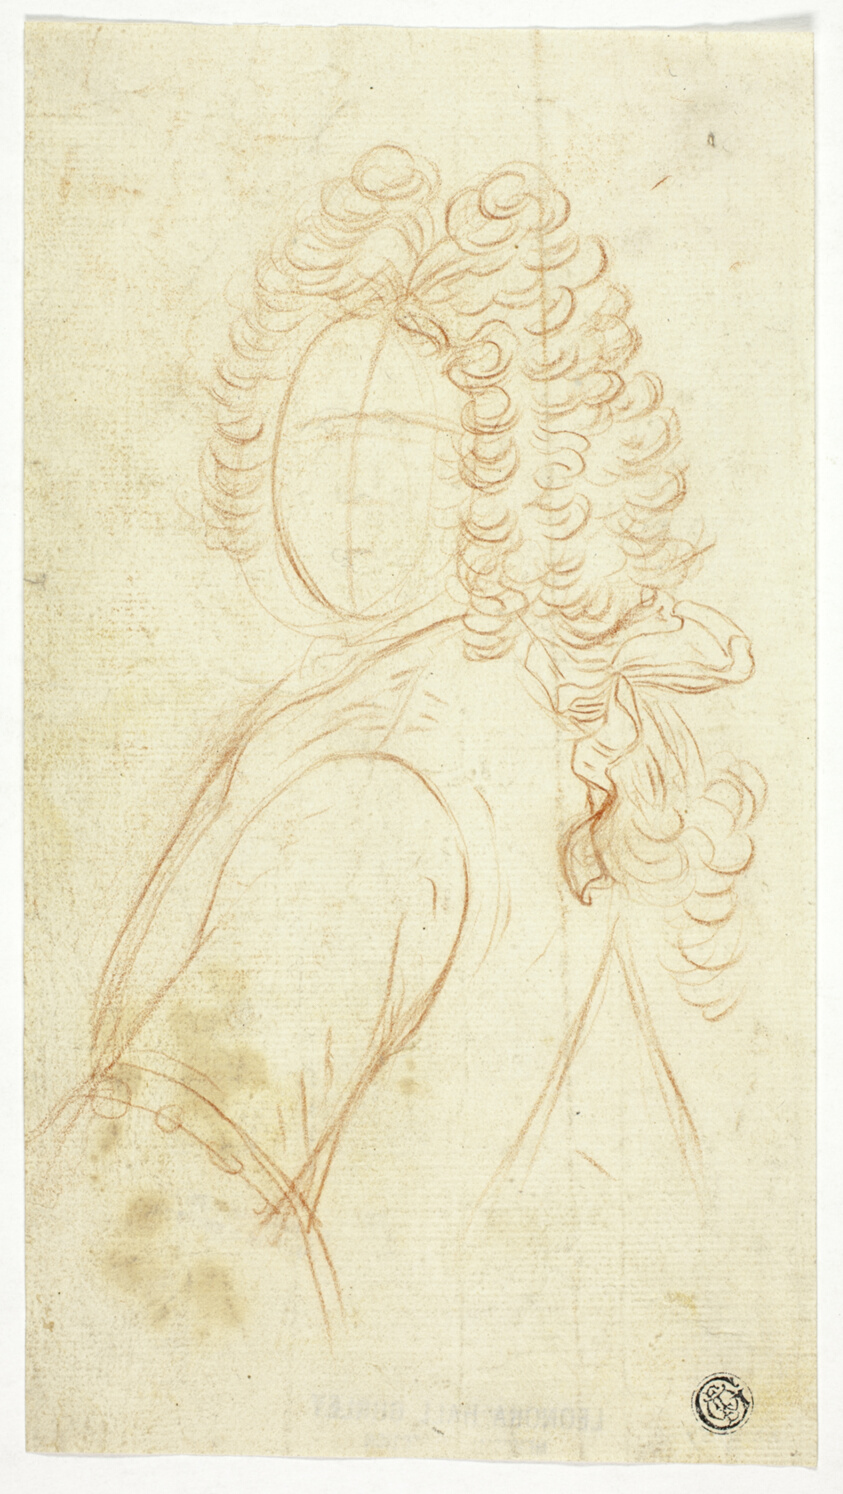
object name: Drawing and Watercolor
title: Half-Length Sketch of Gentleman Wearing Wig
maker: Unknown Artist; French, 18th century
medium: Red chalk on ivory laid paper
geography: France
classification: chalk; drawings (visual works); prints and drawing